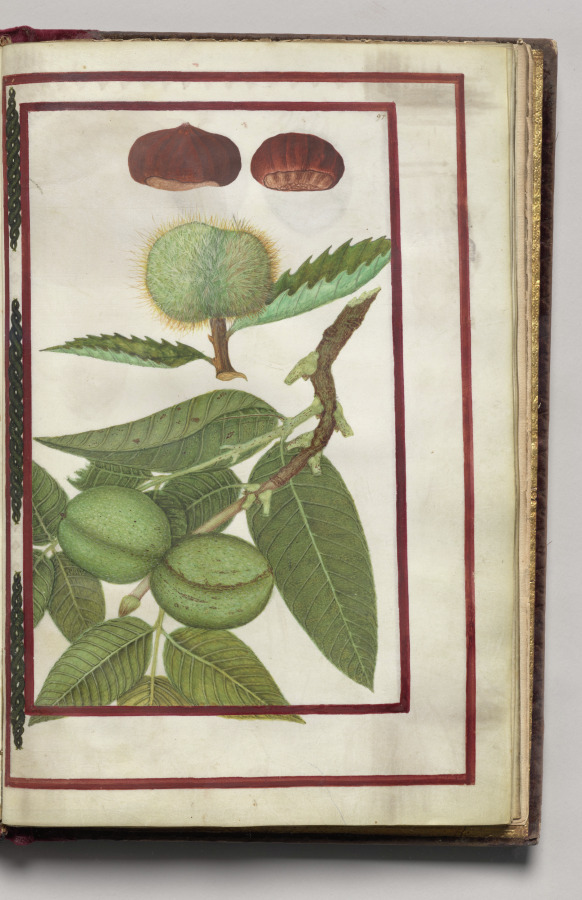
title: Chestnuts with Nut Tree, folio 43 (recto), from Florilegium (A Book of Flower Studies)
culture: France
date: 1608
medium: watercolor, ink, silver, and gold over occasional traces of pencil, on vellum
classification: Bound Volume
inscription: Dated: Poitiers 1608 (on frontispiece) Signed: On frontispiece in black ink, lower right: Van Kuyk Notation on drawing: Frontispiece: in pencil, lower margin: * élève de Van Kessel, peintre flammand (* in pencil also appears in front of Van Kuyk's name).